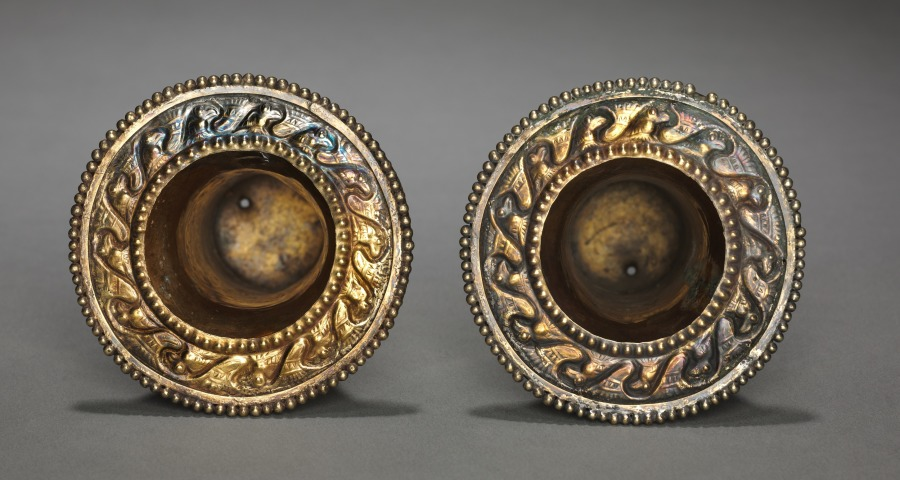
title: Pair of Ear Flares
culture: Peru, North Coast, Chimú style (900-1470)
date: 900–1470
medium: hammered gold alloy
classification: Metalwork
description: North Coast ear ornaments typically have a long shaft that balanced the weight of the glorious frontal. This pair illustrates Chimú interest in the sea, which had great economic and religious importance. On the shafts are bands of seabirds and waves, and a similar pattern edges the frontals, which were altered in modern times. Originally solid disks, the frontals' centers were cut out and a dotted band was added to the rim.